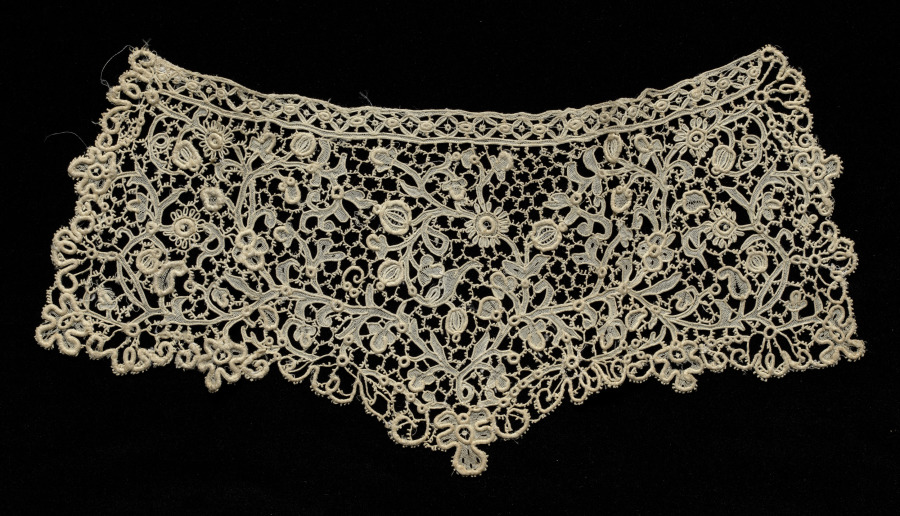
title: Lace Cuff (One of a Pair)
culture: Italy, Venice, 1600s-1700s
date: 1600s–1700s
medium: linen: needle lace (Venetian Rose Point)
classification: Lace